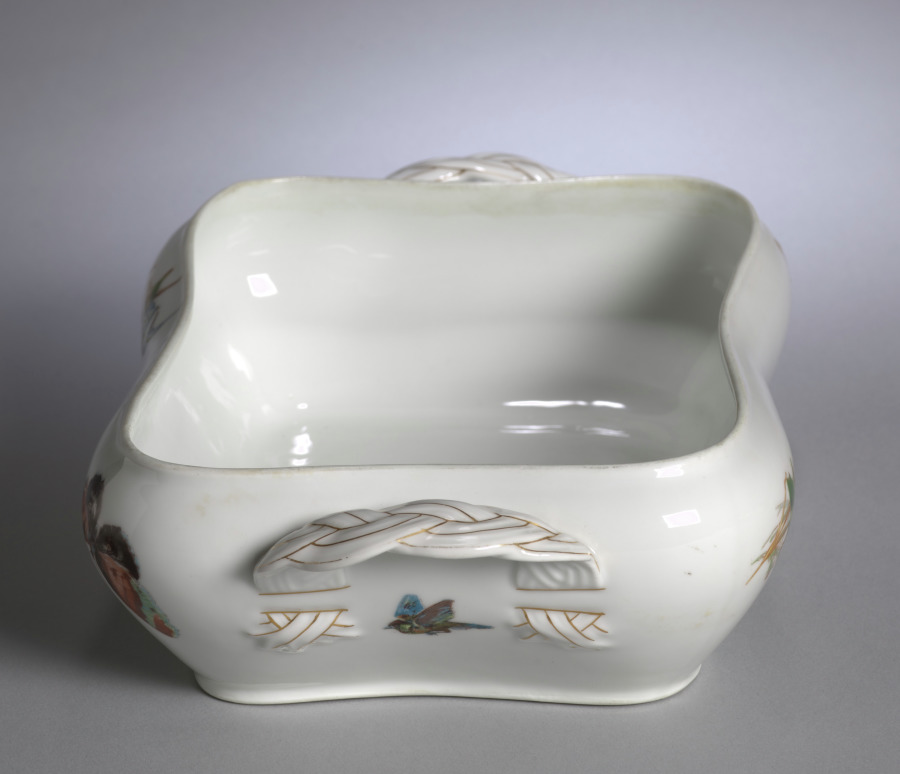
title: Vegetable Bowl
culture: France, Limoges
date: c. 1890–1910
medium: porcelain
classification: Ceramic